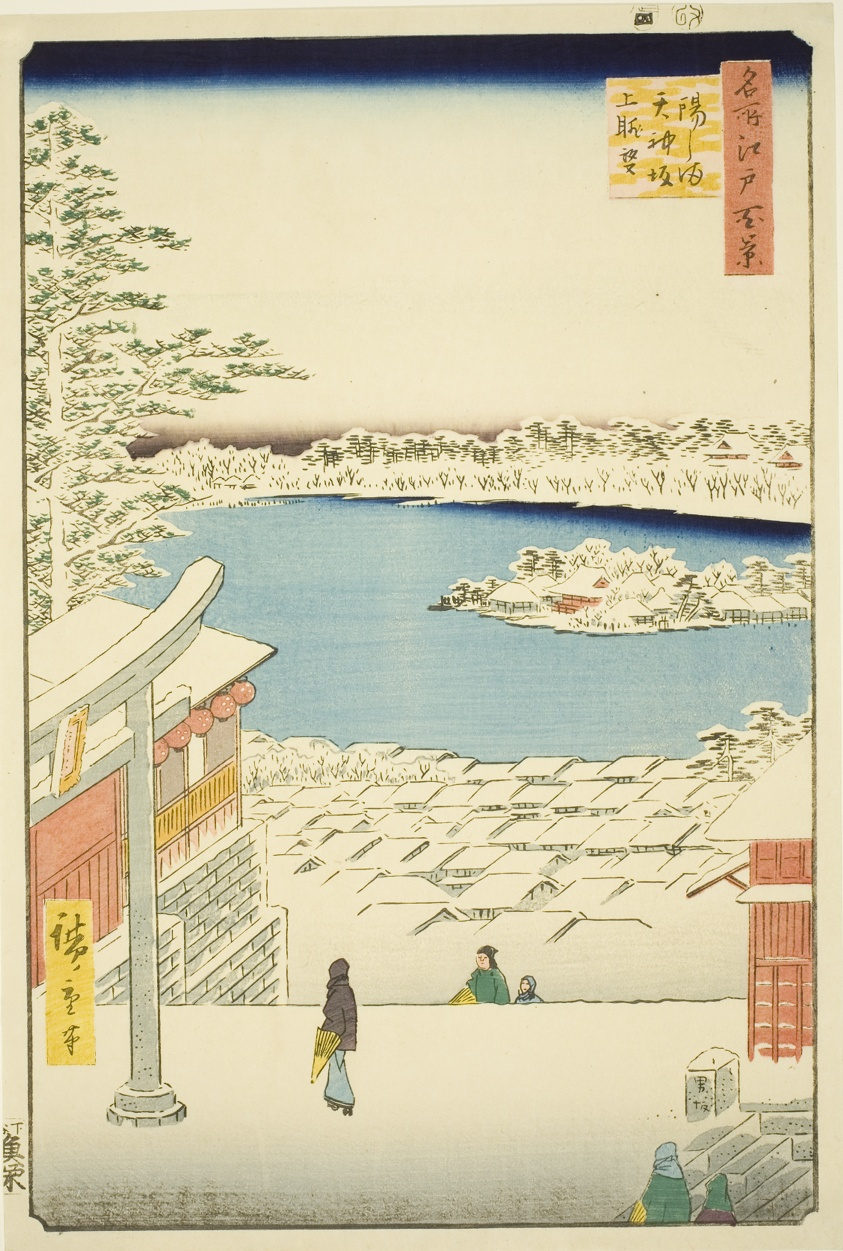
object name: Print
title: Hilltop View from Yushima Tenjin Shrine (Yushima Tenjin sakaue tenbo), from the series "One Hundred Famous Views of Edo (Meisho Edo hyakkei)"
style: Japanese (culture or style)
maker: Utagawa Hiroshige 歌川 広重; Japanese, 1797-1858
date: 1856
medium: Color woodblock print; oban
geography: Japan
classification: woodblock print; print; asian art